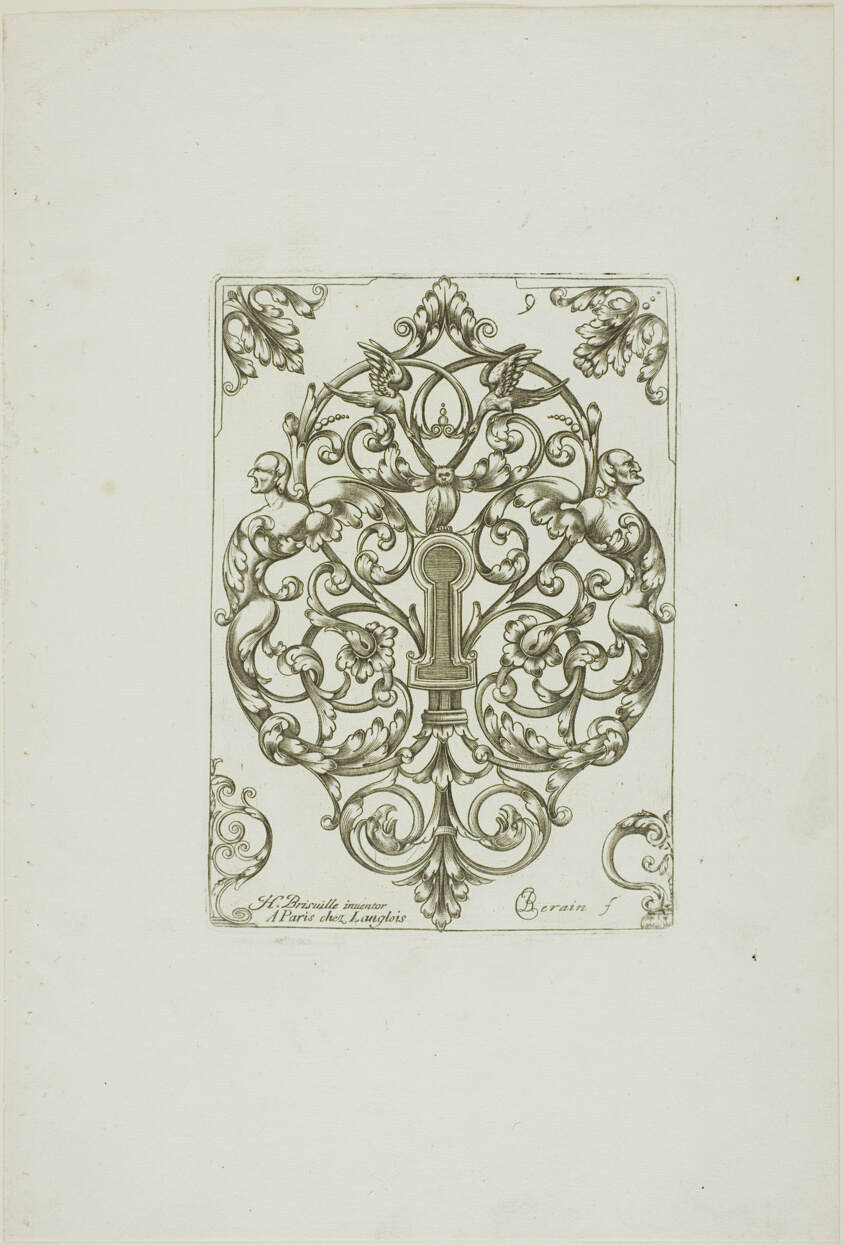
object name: Print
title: Designs for Locksmiths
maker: Jean Bérain I (French, 1640-1711); after Hugues Bris e Ville (French)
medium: Etching on paper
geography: France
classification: etching; print; prints and drawing